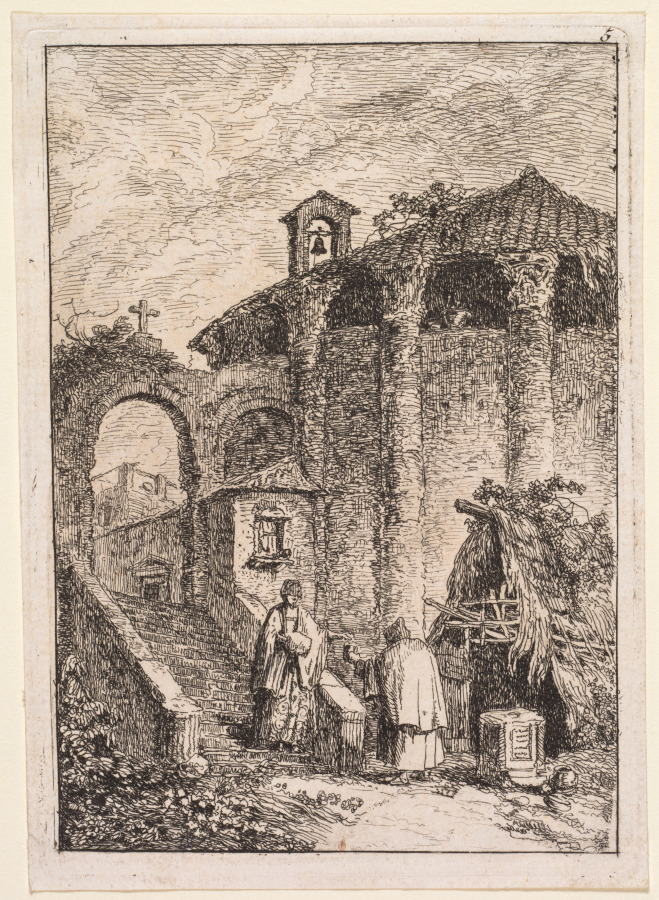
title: Le Temple Antique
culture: France, 18th century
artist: Hubert Robert (French, 1733–1808)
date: 1763–64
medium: etching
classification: Print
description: Derived from his own pen-and-ink drawings, this suite of etchings features fictional characters situated near recognizable buildings and statues in Rome. On the title page, Robert dedicated the suite to Marguerite Le Compte, who visited Rome in 1764 in the company of the wealthy author and art enthusiast Claude Henri Watelet. Both Le Compte and Watelet were amateur etchers, and they socialized with a group that included artists and printmakers centered at the academies in Italy. Robert’s dedication was likely motivated by the hope of future patronage from Le Compte. She may be the generous woman with a hand muff depicted in The Ancient Temple, the fifth scene in this series.